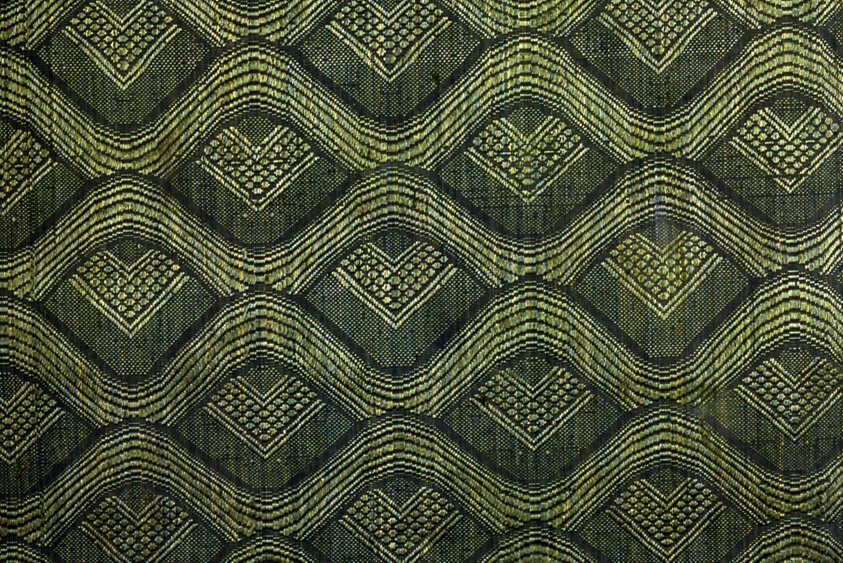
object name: Textile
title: Panel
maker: Italy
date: 17th century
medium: Silk, plain weave with supplementary patterning warps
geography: Italy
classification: textile; weaving